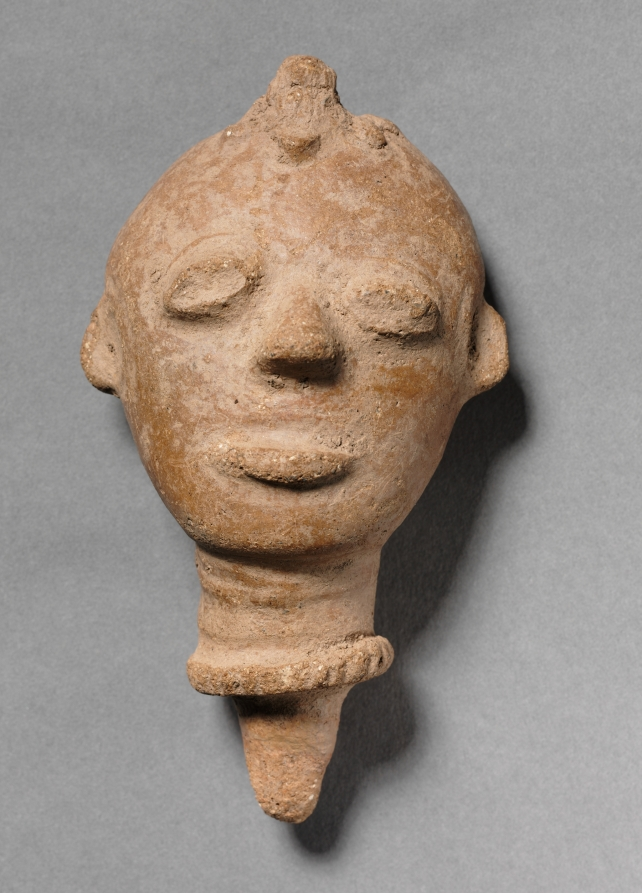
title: Head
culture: Africa, West Africa, Ghana, Akan-style artist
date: 1650–1700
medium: terracotta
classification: Sculpture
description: Akan sculptures made head forms as idealized portraits of the deceased. Made of terracotta, a low-termperature fired ceramic, this head features simple shapes of triangles, curves, and lozenges to represent the nose, mouth, and eyes. The style of this terracotta memorial head allows us to date it, and locate its likely place of manufacture. Scholars believe that this small, hollow-backed style sculpture is from the Ahinsan funerary site and was made between 1650 and 1700.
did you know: The projection below the neck would allow this head to function as a stopper for a vessel or as a way to affix it to the body of a statue.